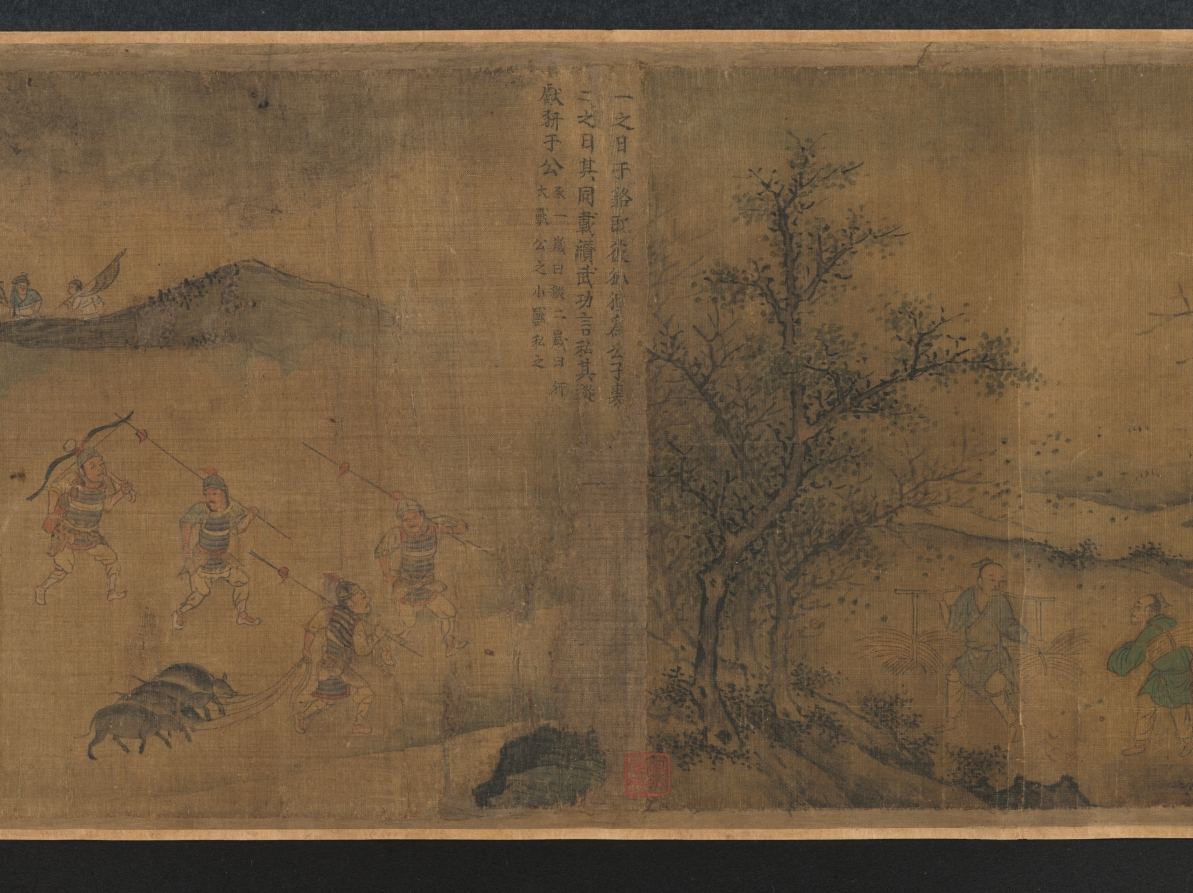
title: "Seventh Month" from the Odes of Bin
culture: China, Southern Song dynasty (1127-1279)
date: 1200s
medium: Handscroll; ink and color on silk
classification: Painting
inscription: Colophons: 1. [on the frontispiece] by the Qianlong emperor (dated 1741). 2. by Lu Wan (dated Zhengde dingchou, 1517). 2. by the Jiaqing emperor (dated 1807).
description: According to Confucian thought, the ruler looks after the well-being of his people which involves agricultural activities. Seventh Month from the ancient Odes of Bin in the Shijing (Book of Poetry) describes occupations throughout the year, including plowing, harvesting, hunting, making clothes, and observing rituals. The earliest illustrations of these Odes accompanied by text were commissioned by Southern Song emperor Gaozong (reigned 1127–1162). As the lower Yangzi delta had become the new seat of government, Gaozong had sets of these illustrations produced by court artists to revive the dynasty and convince the Confucian officialelite of his legitimacy to rule.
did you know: The Odes of Bin appears in the classic Shijing (Book of Poetry), an anthology of more than 300 poems, folk songs, and ceremonial hymns that were originally chanted to music.